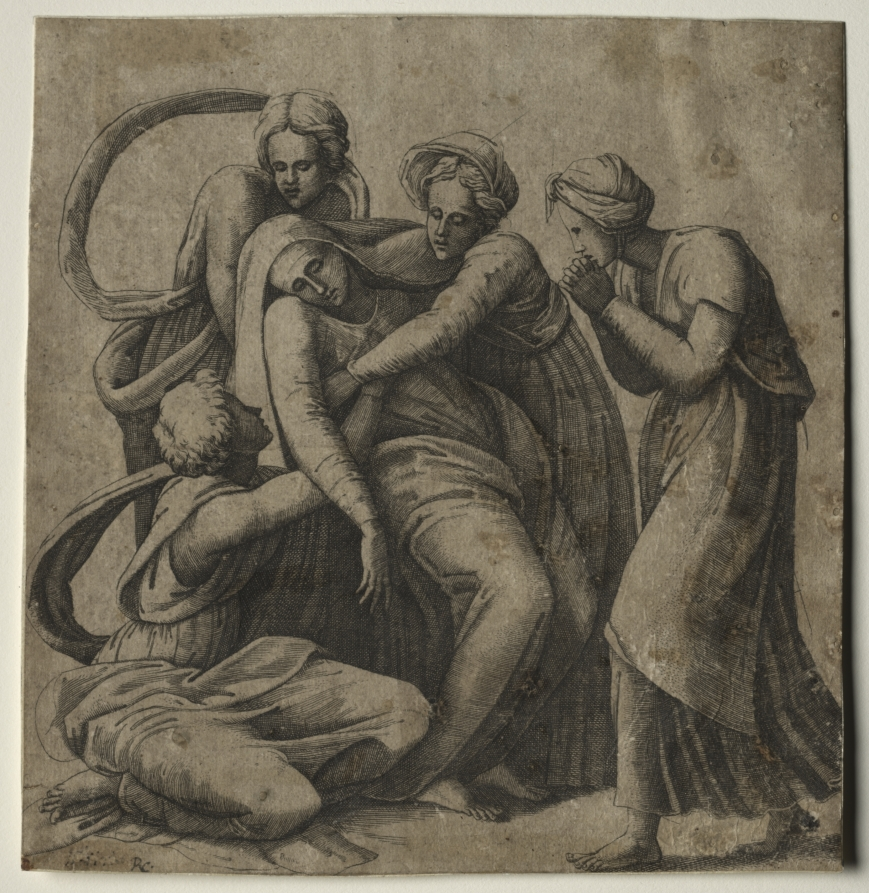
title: The Virgin Fainting in the Arms of Three Holy Women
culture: Italy, 16th century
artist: Giulio Bonasone (Italian, c. 1510–after 1576)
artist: after Raphael (Italian, 1483–1520)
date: mid-1500s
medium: engraving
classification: Print